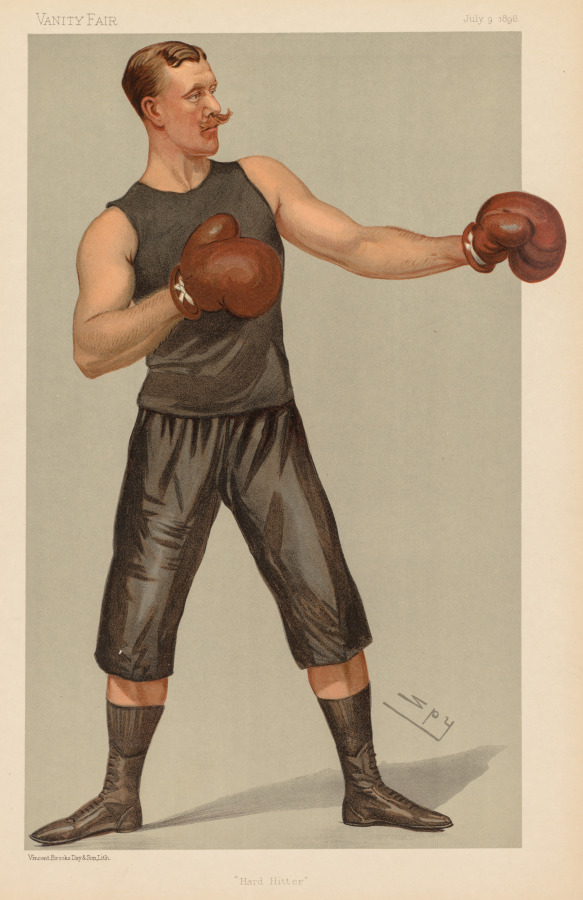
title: Vanity Fair: "Hard Hitter"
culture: England, 19th century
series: published in Vanity Fair July 9, 1896;Vanity Fair. (Boston: Frame Central, 1992.) p. 26, 9 July, 1896, M. No. 652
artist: Leslie Matthew (Spy) Ward (British, 1851–1922)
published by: Vincent Brooks Day & Son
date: 1896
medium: color lithograph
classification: Print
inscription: artist monogram, "Spy" in stone On mat, in graphite: VANITY FAIR SERIES # 652 JOHNSTONE; in graphite, verso: Johnstone #652